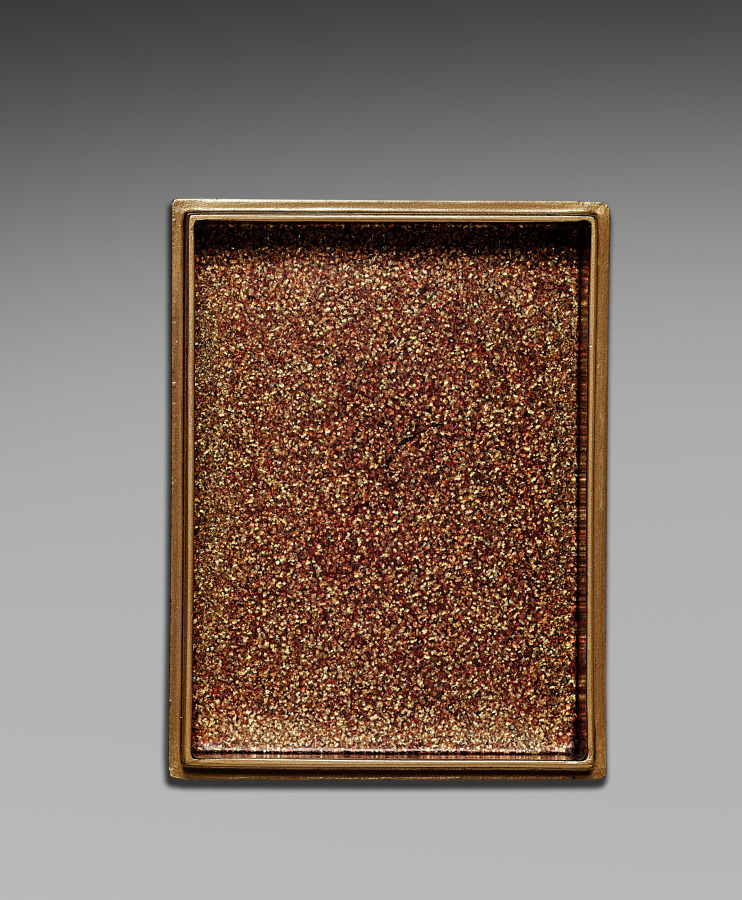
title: Nested Boxes with Chrysanthemums (inner box lid)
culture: Japan, Meiji period (1868–1912)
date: early 1900s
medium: lacquer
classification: Lacquer